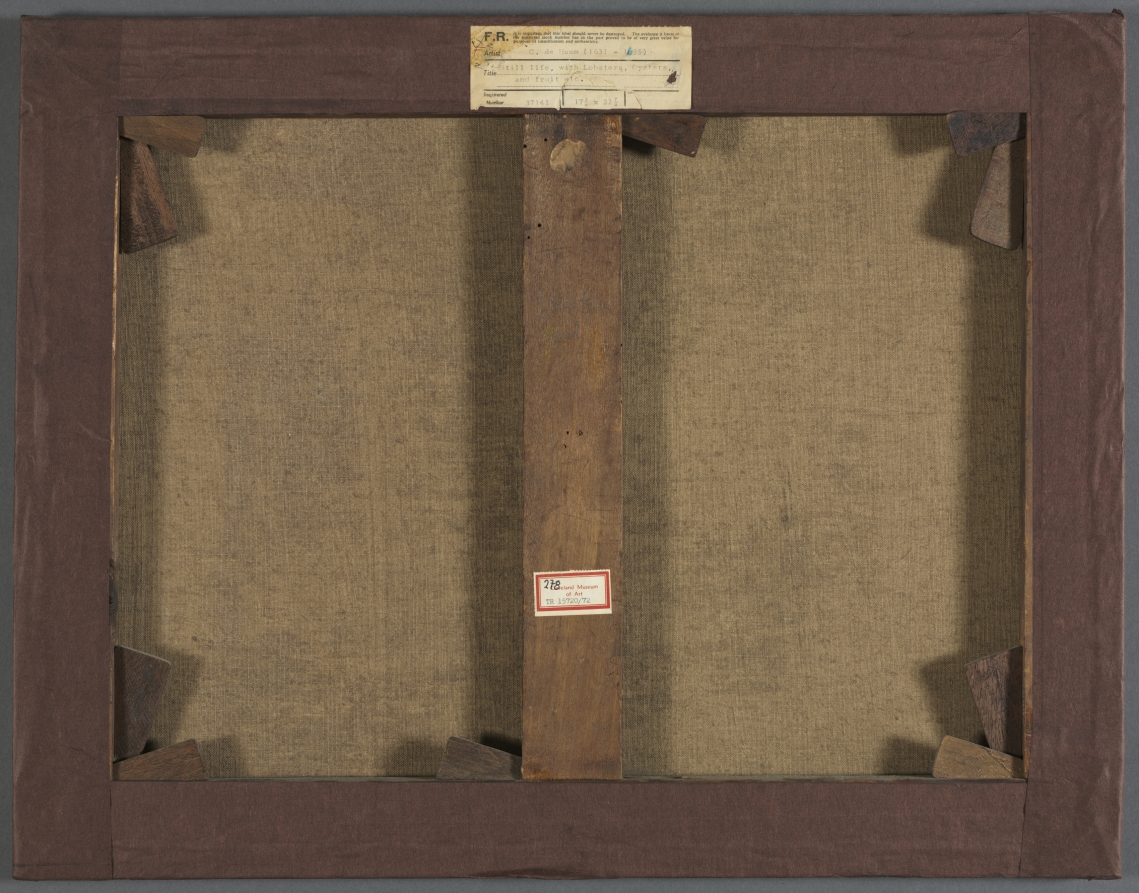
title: Still-Life with Crayfish, Oysters, and Fruit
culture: Flanders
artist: follower of Cornelis de Heem (Flemish, 1631–1695)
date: late 1600s or early 1700s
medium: oil on canvas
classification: Painting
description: The porcelain bowl in this painting most likely came from China. Political turbulence in China effectively eliminated ceramic imports to the West by the 1640s, so the bowl would have been considered at least as valuable as the gold object on the table.